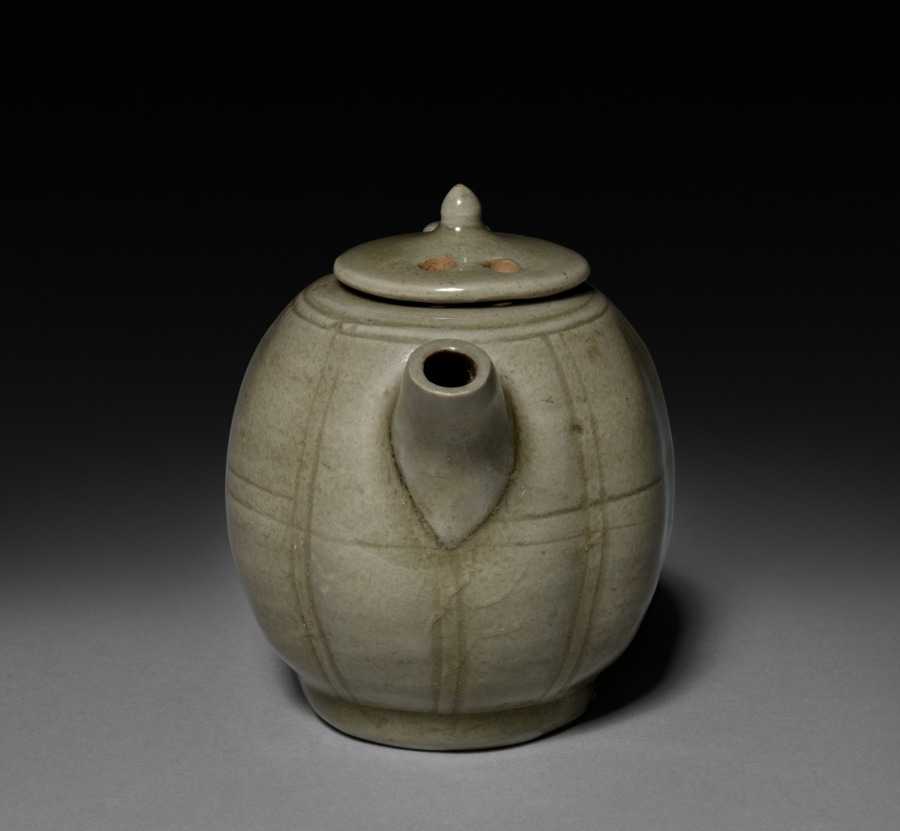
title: Wine Pot: Southern Celadon Ware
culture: China, Southern Song Dynasty (1127-1279) - Yuan Dynasty (1271-1368)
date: 1200s-1300s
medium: glazed porcelain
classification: Ceramic